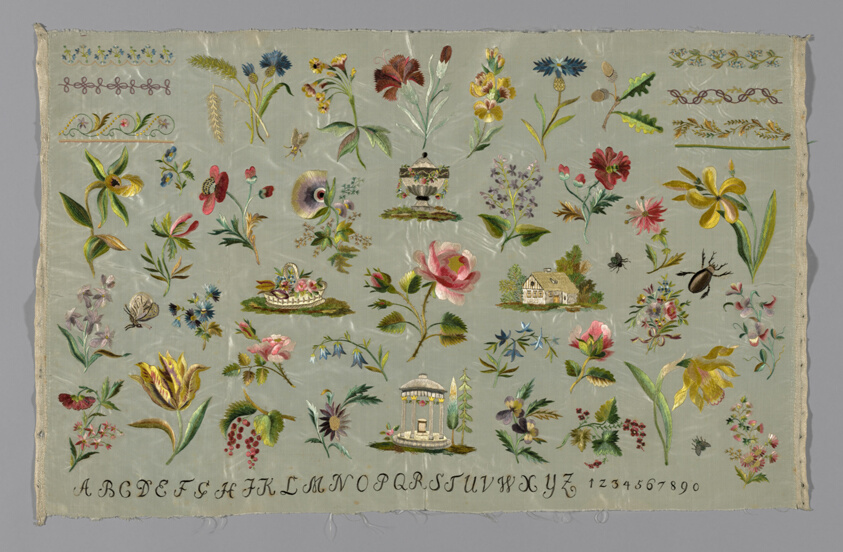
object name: Textile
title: Sampler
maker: Possibly Germany or Netherlands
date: 18th century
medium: Silk, plain weave; embroidered with silk floss and yarns, chenille yarns, and silk, plain weave ribbons; embroidered in chain, individual running, satin, padded satin, single satin, split, and stem stitches; French knots, laidwork, couching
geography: Germany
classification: textile; needlework (visual works); sampler